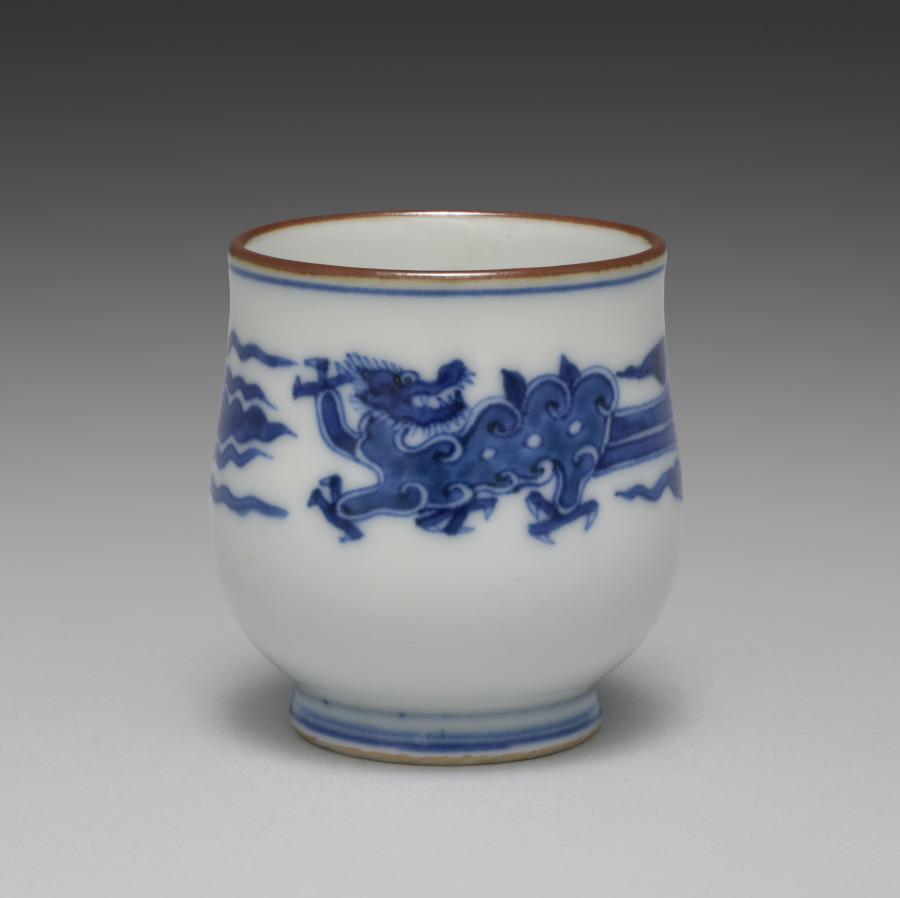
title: Cup from Sake Cups with Dragons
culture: Japan, Meiji period (1868–1912)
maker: Seifū Yohei III (Japanese, 1851–1914)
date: c. 1893–1914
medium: One from a set of six sake cups; porcelain with underglaze blue and iron oxide rims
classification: Ceramic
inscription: 大日本清風造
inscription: 清風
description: Each of these sake cups pictures two backward-looking dragons. The highly stylized creatures resemble jade carvings.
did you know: Seifū Yohei III was inspired by the Chinese mythical animals that were common on porcelain objects made at Jingdezhen in China during the Ming dynasty (1368–1644) and then exported around the world.